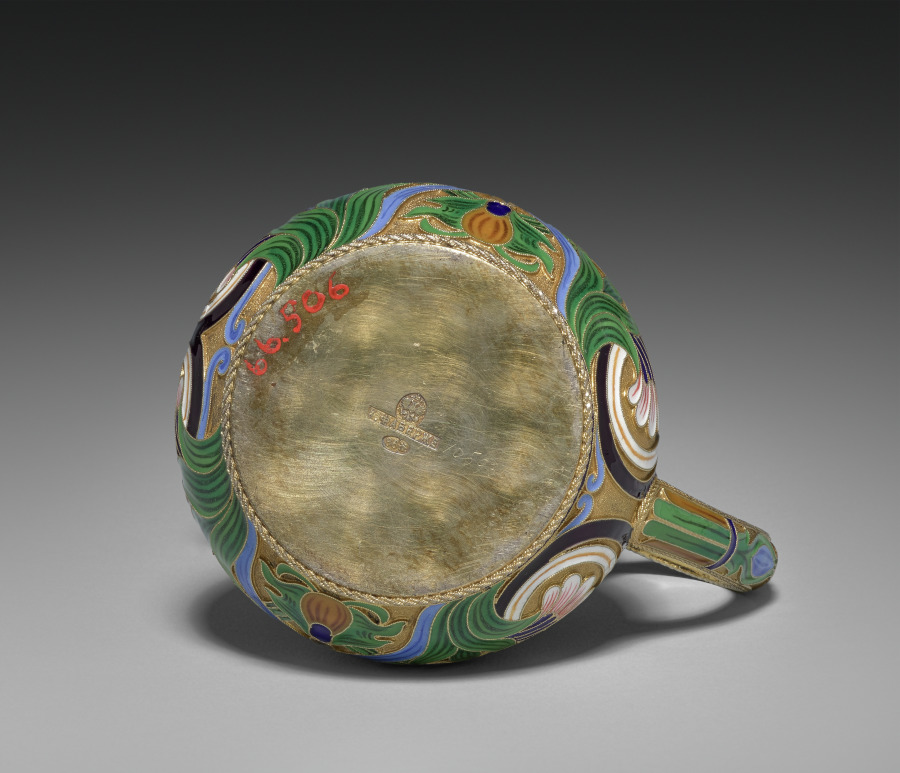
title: Creamer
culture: Russia, St. Petersburg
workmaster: attributed to Feodor Ivanovich Rückert (Russian, 1840–1917)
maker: House of Fabergé (Russian, 1842–1918)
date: 1887–96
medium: silver gilt, opaque cloisonné enamel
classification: Miscellaneous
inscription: 88, St. George [assay mark for Moscow, 1882-1896]; C. Fabergé (in Cyrillic); double-headed eagle [imperial warrant]; 10593 scratched.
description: Fabergé’s craftsmen in Moscow, especially under the watchful eye of workmaster Feodor Rückert, became known for their work in the Pan-Slavic or Neo-Russian style, hearkening back to 17th-century motifs of Russian folk art. Often on rather conventional shapes, Rückert and his silversmiths created an explosion of color, achieved through the historic technique of cloisonné enamel in which tiny metal lines are soldered to the surface then filled with glass powders in various colors and fired to create a high gloss finish. The result is a spectacular evocation of the 17th-century originals. Far from mere copies, however, Rückert's designs, such as this tea service, employ naturalistic or abstract motifs in a thoroughly modern adaptation of a remarkable earlier period of Russian art and decoration.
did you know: This creamer is part of a larger tea service.